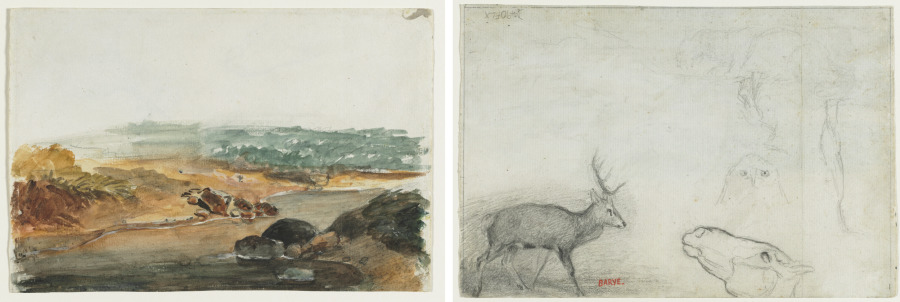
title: Landscape (recto); Studies of Animals (verso)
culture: France, 19th century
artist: Antoine-Louis Barye (French, 1796–1875)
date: c. 1823–75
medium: watercolor with white gouache, and graphite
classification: Drawing